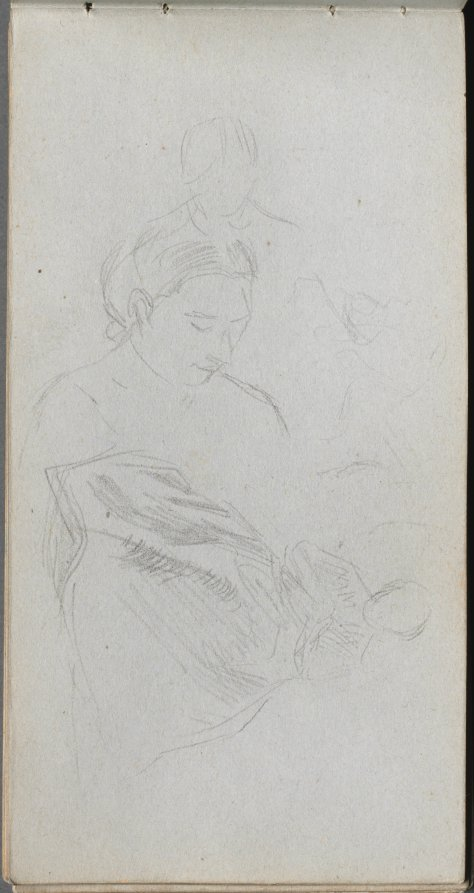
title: Sketchbook, page 82: Study of Fgures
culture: France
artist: Ernest Meissonier (French, 1815–1891)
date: c. 1860s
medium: graphite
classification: Bound Volume